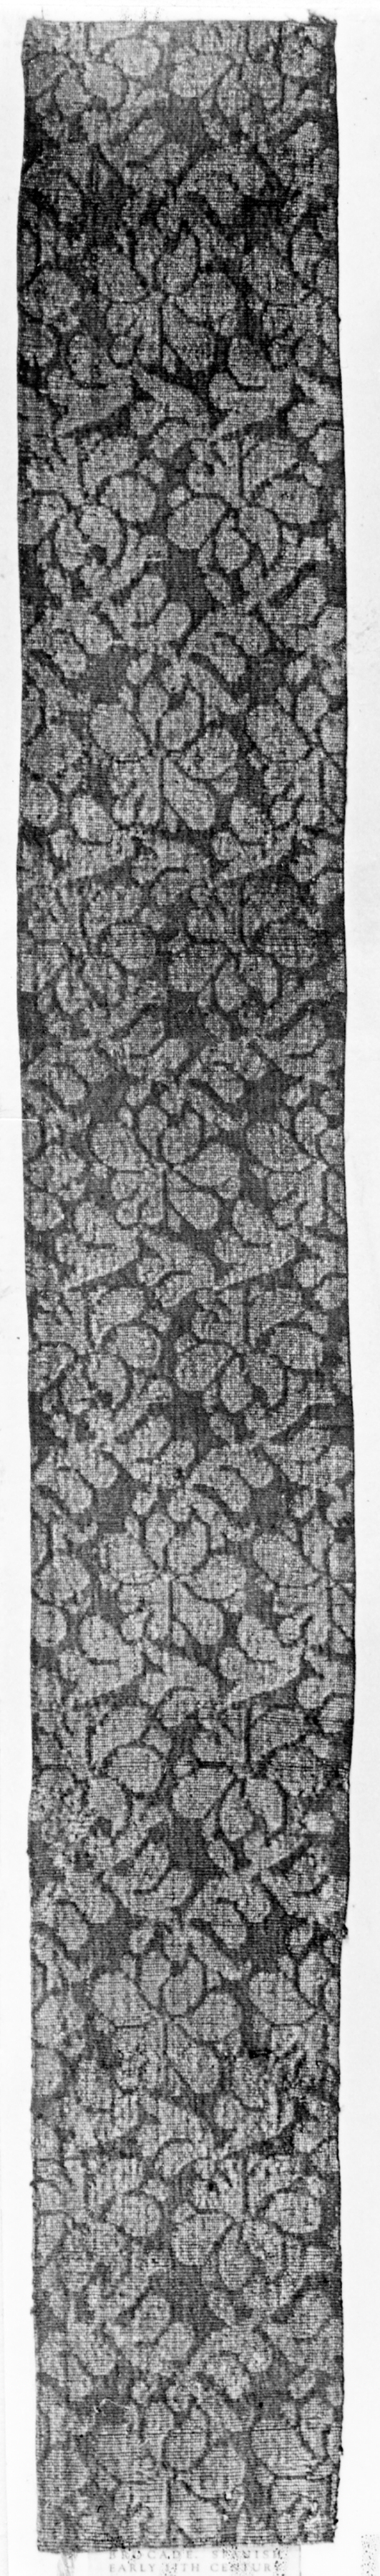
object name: Textile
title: Fragment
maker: Italy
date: Mid–17th century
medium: Silk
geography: Italy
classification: textile; weaving